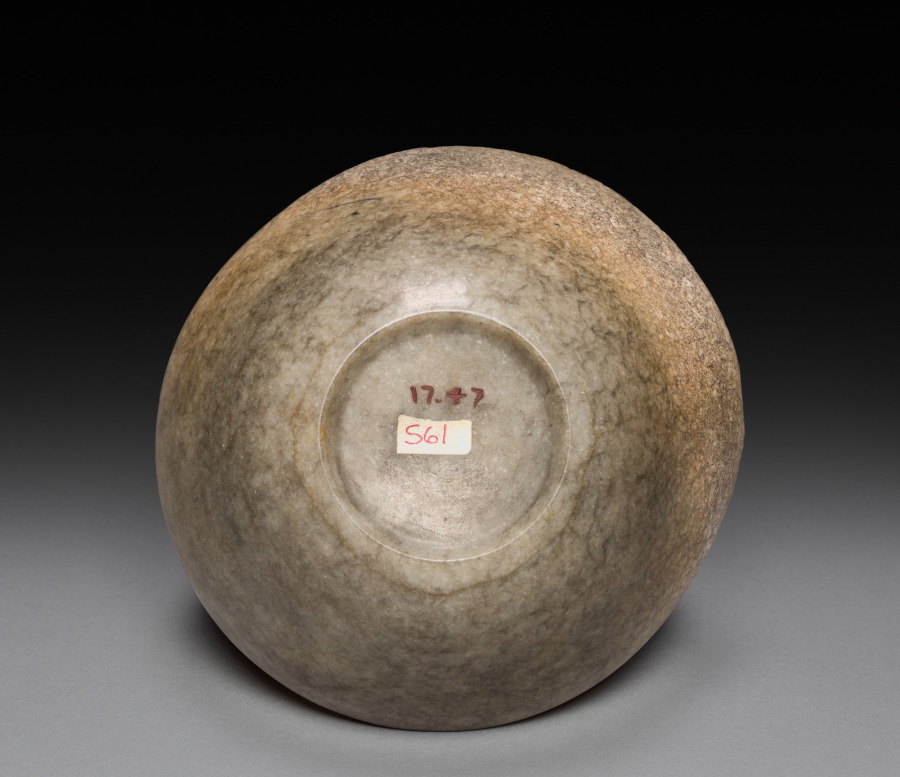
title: Libation Cup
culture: China, Song dynasty (960-1279) or later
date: 960–1279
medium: jade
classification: Jade